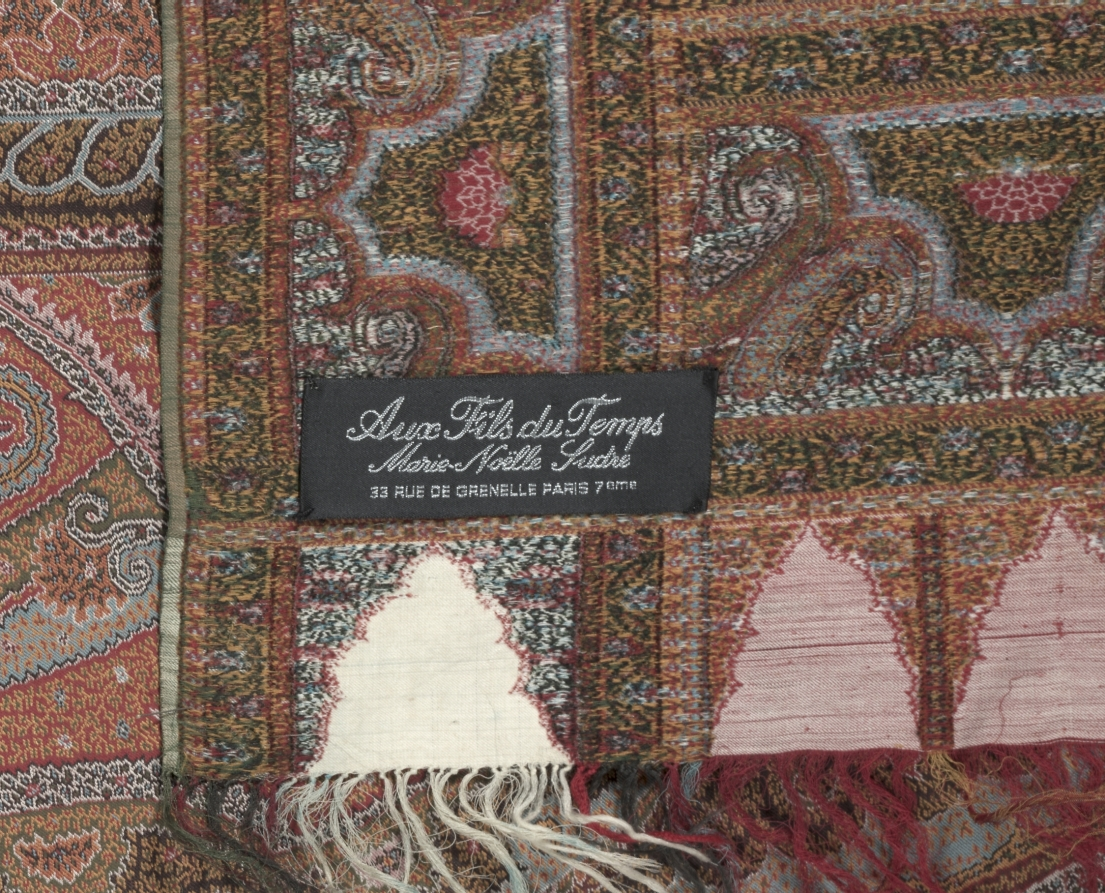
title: Long Shawl with Botehs, Black Center, and Lobed Arcades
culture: France, Paris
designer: Emile Frederic Herbert (French)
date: 1855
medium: supplemental weft pattern; silk?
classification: Textile